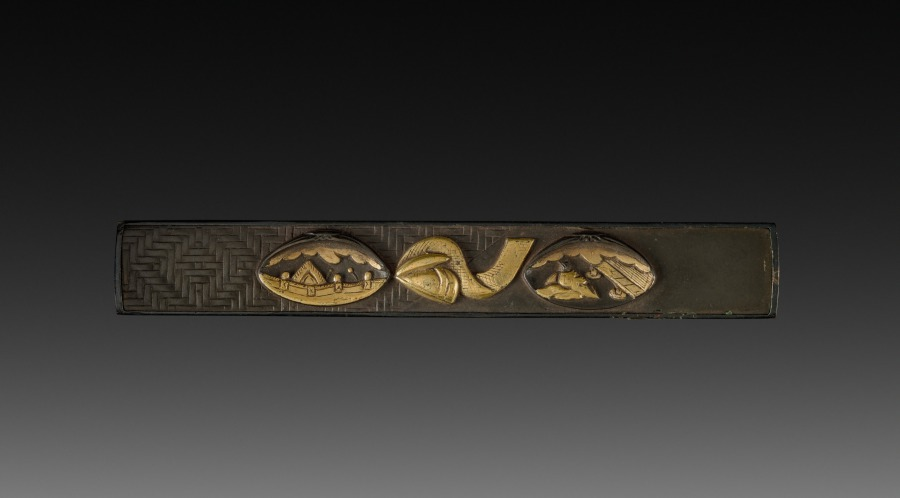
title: Knife Handle (Kozuka)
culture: Japan, Edo period (1615–1868)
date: early to mid-1800s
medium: inlaid bronze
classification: Metalwork